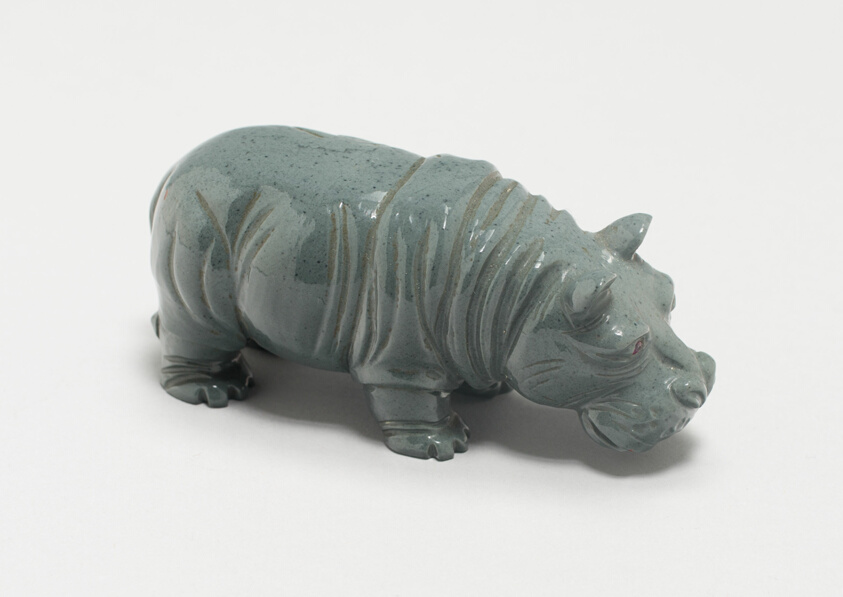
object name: Metalwork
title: Miniature Hippopotamus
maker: Fabergé Workshop; Saint Petersburg, Russia, 1842-1917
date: c. 1890/00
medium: Kalgan jasper and faceted ruby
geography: Saint Petersburg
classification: stone; miniature; european decorative arts; metalwork